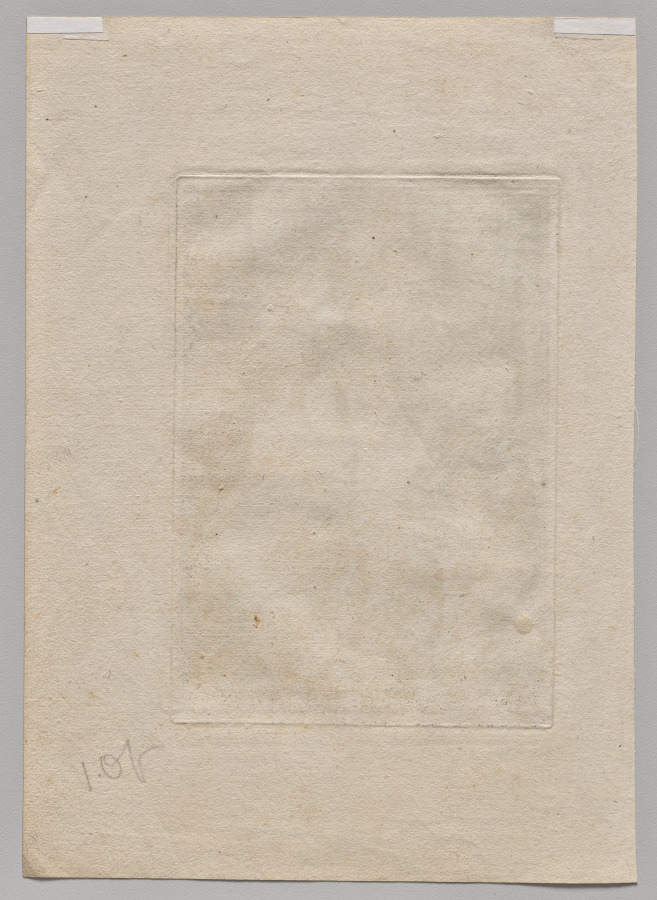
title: Plate 2: Levi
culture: Netherlands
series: The Twelve Sons of Jacob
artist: Jacob de Gheyn II (Netherlandish, 1565–1629)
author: after Karel I van Mander (Netherlandish, 1548–1606)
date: c. 1589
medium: engraving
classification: Print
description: In this print, the biblical figure Levi holds a sword next to a bishop’s mitre, denoting his tribe’s association with the priesthood. This is one of a series of prints depicting the twelve sons of Jacob, each with an attribute and costume that denotes his character. According to the Old Testament, Jacob blessed each of his twelve sons, prophesizing the destiny of their tribe, and assigning them a parcel of land in Canaan (present-day Israel). The print series was made in the Netherlands in the late 16th century, a time of political struggle when Old Testament heroes were popular exemplars of fortitude and patience.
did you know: The columnar architecture behind this Old Testament figure suggests the future of his tribe as members of the priesthood.